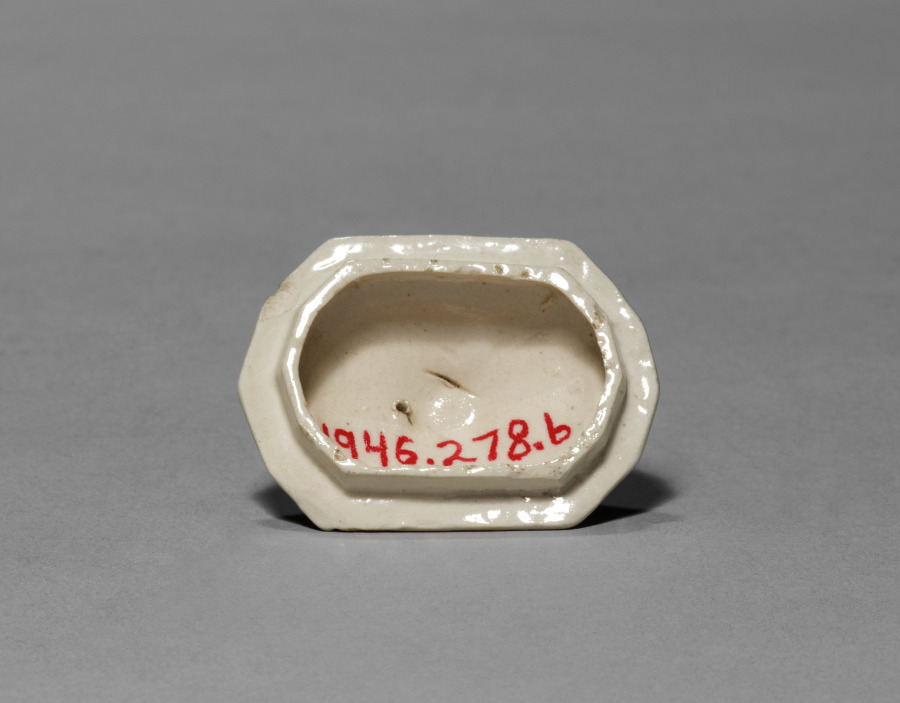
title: Teapot (lid)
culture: England, Staffordshire, 18th century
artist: Staffordshire Factory (British)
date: c. 1745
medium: salt-glaze earthenware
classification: Ceramic